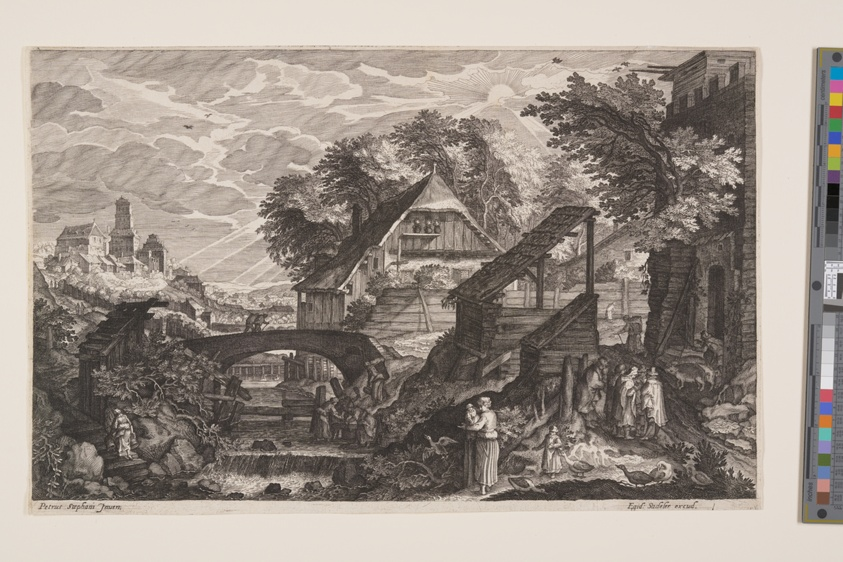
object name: Print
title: Farmhouses on the Right of a River, from Eight Scenes from Bohemia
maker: Aegidius Sadeler II (Flemish, c. 1570–1629); after Pieter Stevens (Flemish, 1567-after 1624)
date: c. 1610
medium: Engraving on ivory laid paper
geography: Flanders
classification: print; paper; prints and drawing; engraving